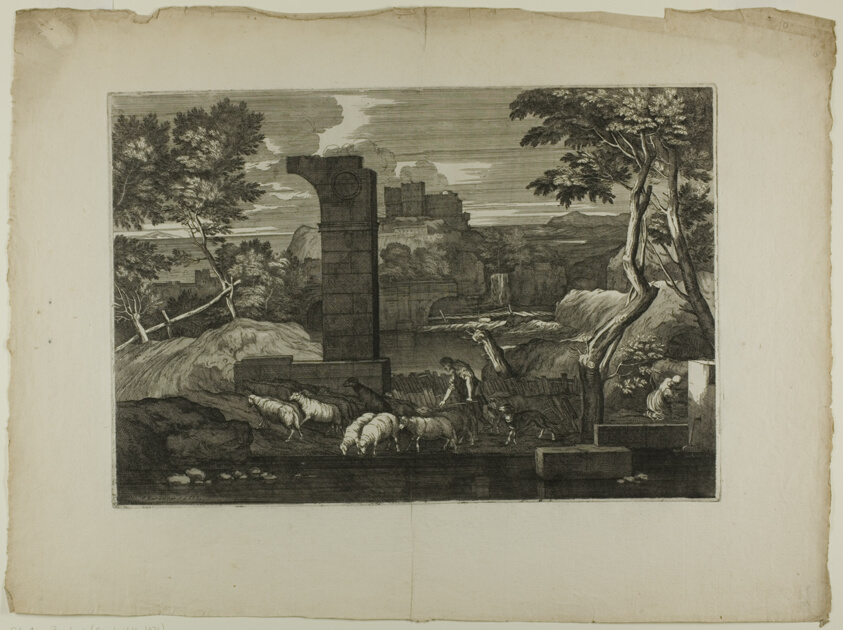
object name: Print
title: Landscape with a Shepherd and His Flock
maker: Sébastien Bourdon (French, 1616-1671)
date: 1668–71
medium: Etching on ivory laid paper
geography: France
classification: etching; print; prints and drawing